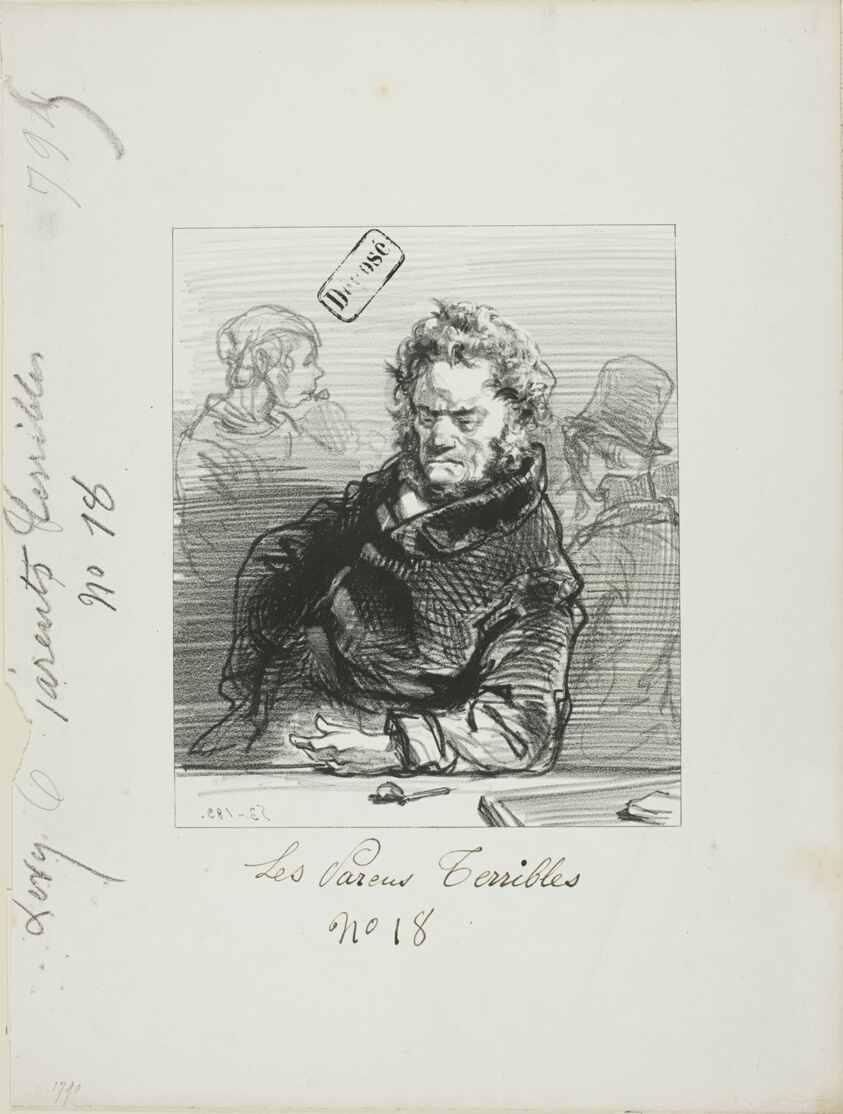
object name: Print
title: Les-Parents-Terribles series: Jacques Maubourj et's son the viscount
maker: Paul Gavarni (French, 1804-1866)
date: 1852–53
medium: Lithograph in black on ivory wove paper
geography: France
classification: lithograph; print; prints and drawing